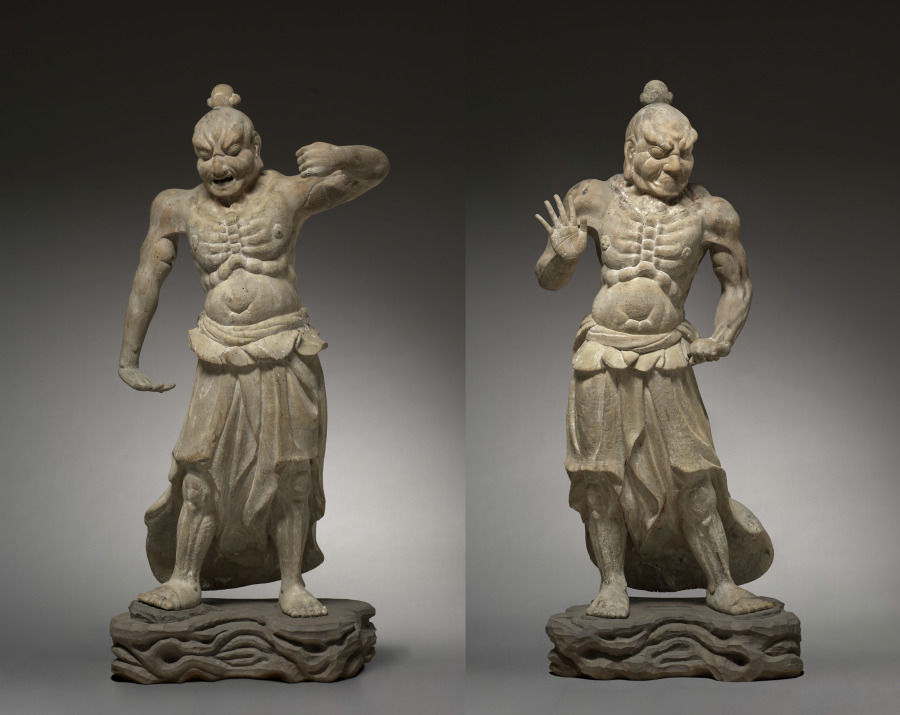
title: Pair of Guardian Kings (Niō)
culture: Japan, Kamakura period (1185–1333)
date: 1200s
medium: Chestnut and cypress wood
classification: Sculpture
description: These wrathful protectors of Buddhism would have once stood within the sides of the main entrance gate to a temple. One has an open mouth that intones the sound ah, and symbolizes the beginning, or life.One has a closed mouth that intones the sound un, and symbolizes the end, or death.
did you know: This is one of a pair of guardian kings, or Nio. Their fierce expressions and postures indicate their protective function.